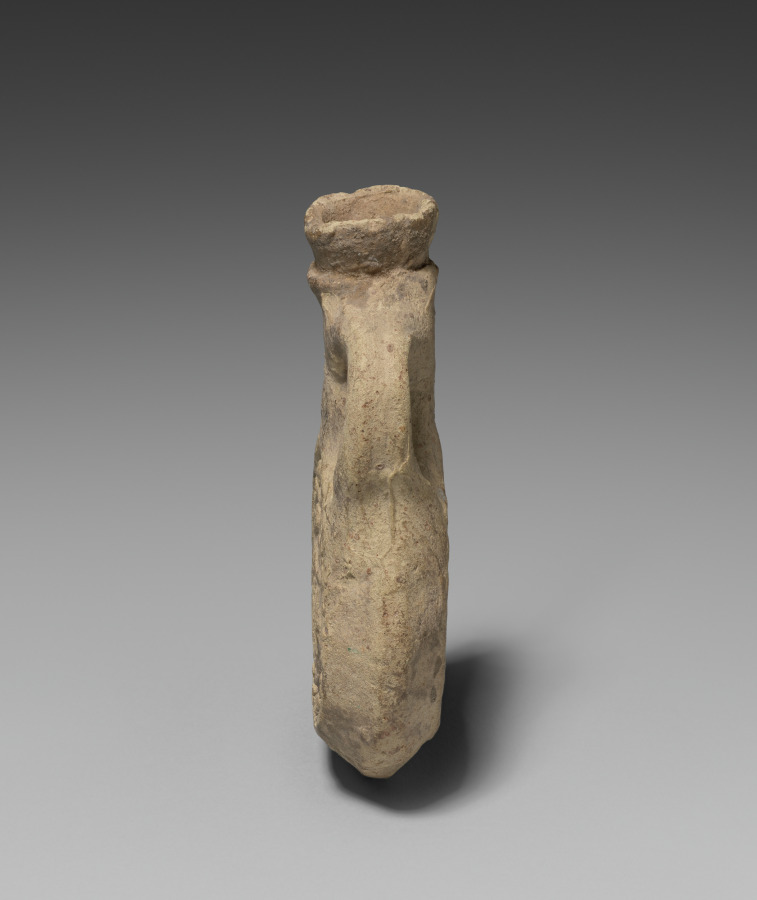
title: Pilgrim's Flask with Saint Menas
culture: Byzantine Empire, Abu Mena (Egypt)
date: 400–600 CE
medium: terracotta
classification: Ceramic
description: These flasks bear the image of Saint Menas, an early martyr of the Christian Church whose shrine was in the desert southwest of Alexandria in Egypt. These flasks were probably used by pilgrims to hold oil taken from the lamp that burned over this saint's tomb. Probably manufactured near the shrine, pilgrim's flasks often bear decorations hinting at their place of origin, as is the case here.